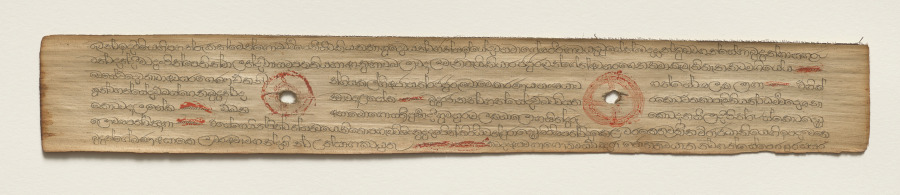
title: Leaf from a Buddhist Manuscript (verso)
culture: Sri Lanka, Singhalese, Late 17th century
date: c. 1700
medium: fiber paper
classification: Manuscript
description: Palm leaf material is still used for manuscripts in Sri Lanka. The palm leaves are prepared first by boiling them, drying them in the sun, and then rubbing them with oils. Scribes then use a metal stylus to incise the text. Then charcoal powder is wiped across the pages, filling in only the inscribed lines.